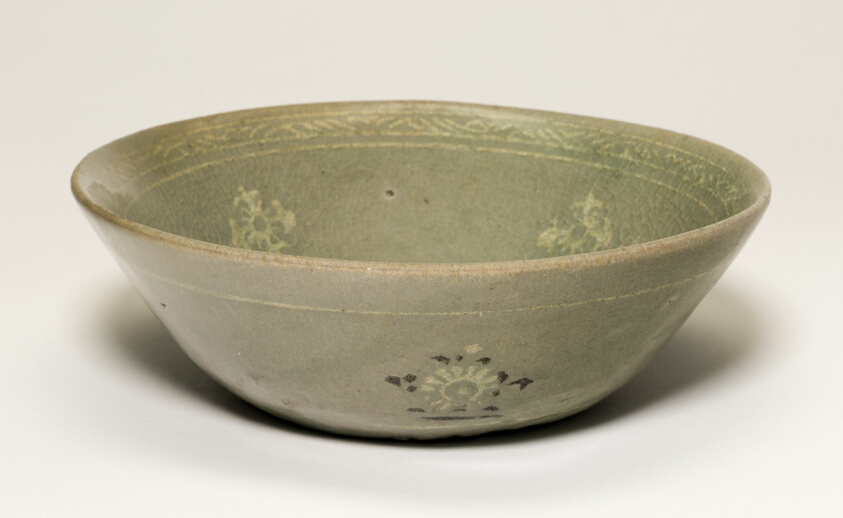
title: Bowl with Chrysanthemum Flower Heads and Clouds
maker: Korea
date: Goryeo dynasty (918–1392), 14th century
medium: Celadon-glazed stoneware with underglaze inlaid decoration of black and white clays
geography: Korea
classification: ceramics; asian art